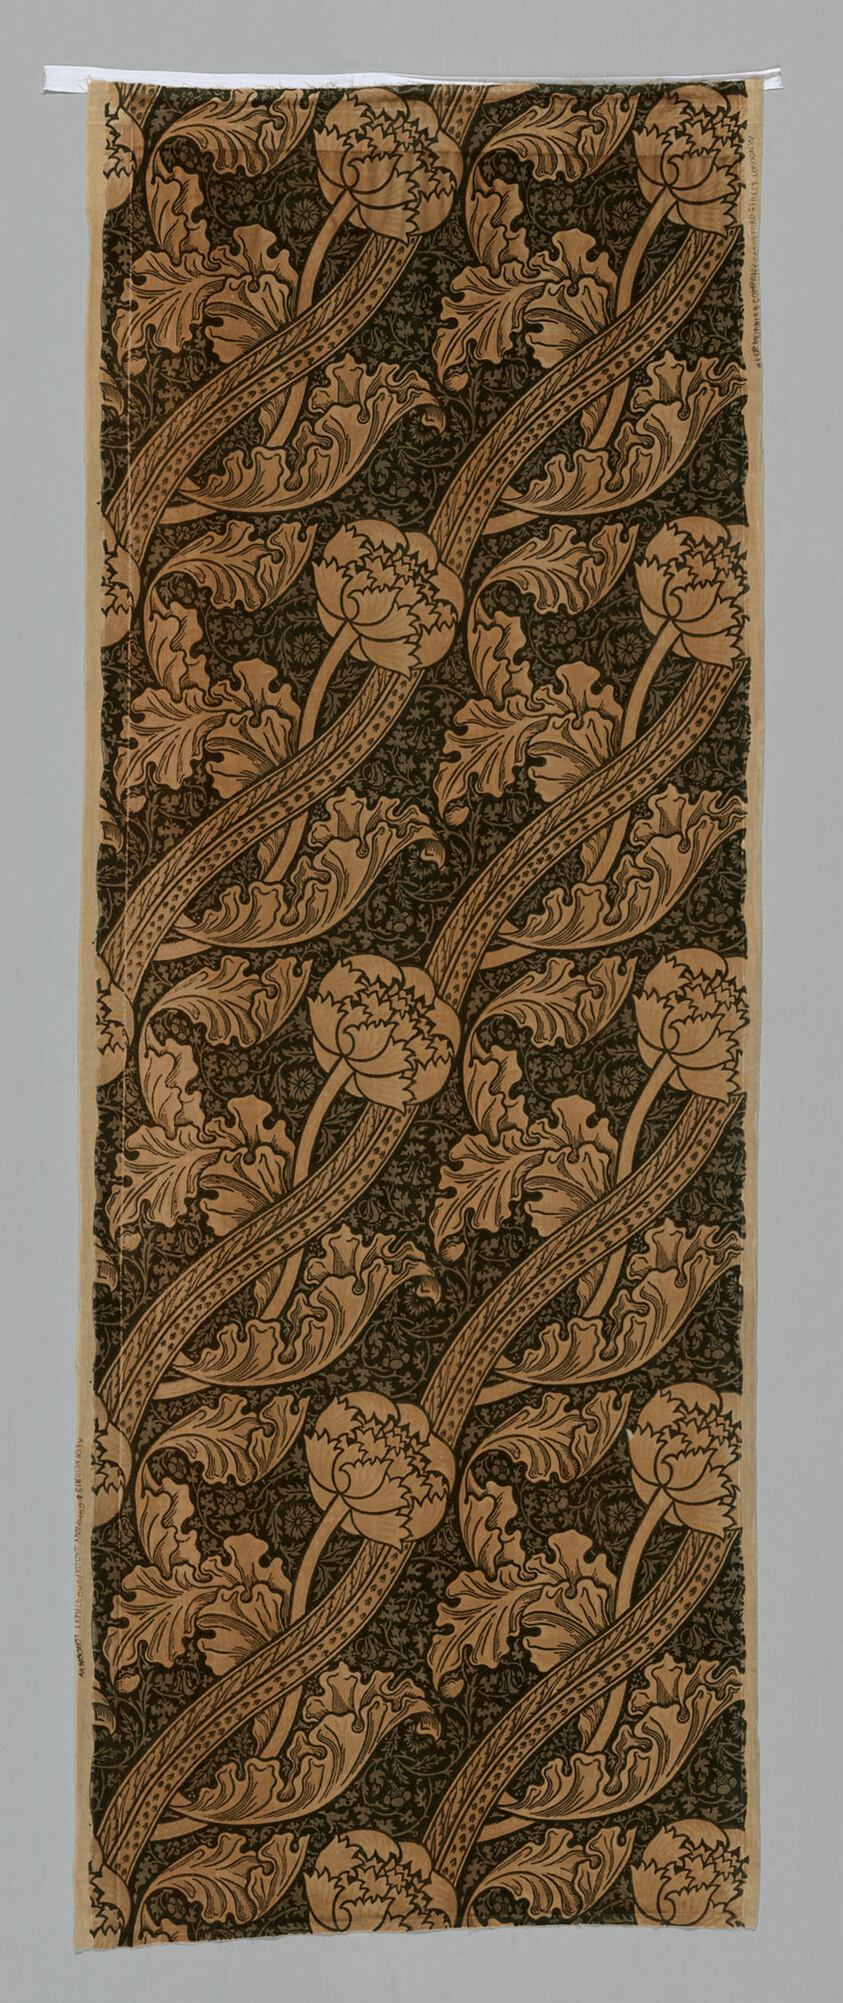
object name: Textile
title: Florence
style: Arts and Crafts Movement, british, 19th century, 20th Century, British Arts and Crafts Movement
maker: Designed by John Henry Dearle (English, 1860–1932); Produced by Morris & Co., London (English, 1875–1940); Merton Abbey, London (English, 1881–1940)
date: Design c. 1890, made 1890–1917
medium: Cotton, twill weave with supplementary pile wefts forming cut solid 'velvet'; block printed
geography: England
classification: textile; weaving - printed; weaving - velvet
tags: flowers, foliage, botanical